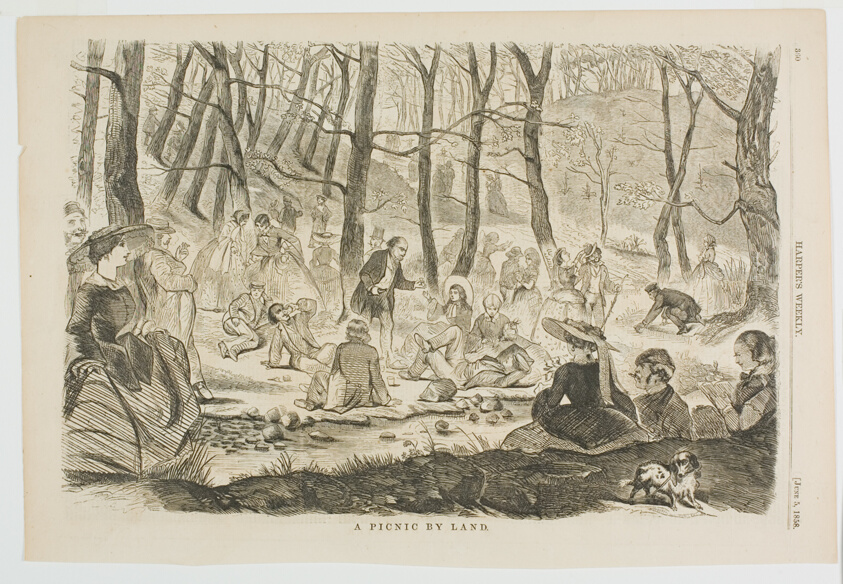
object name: Print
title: A Picnic By Land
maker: Winslow Homer (American, 1836-1910); published by Harper's Weekly (American, 1857-1916)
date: published June 5, 1858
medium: Wood engraving on paper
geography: United States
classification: wood engraving; print; prints and drawing